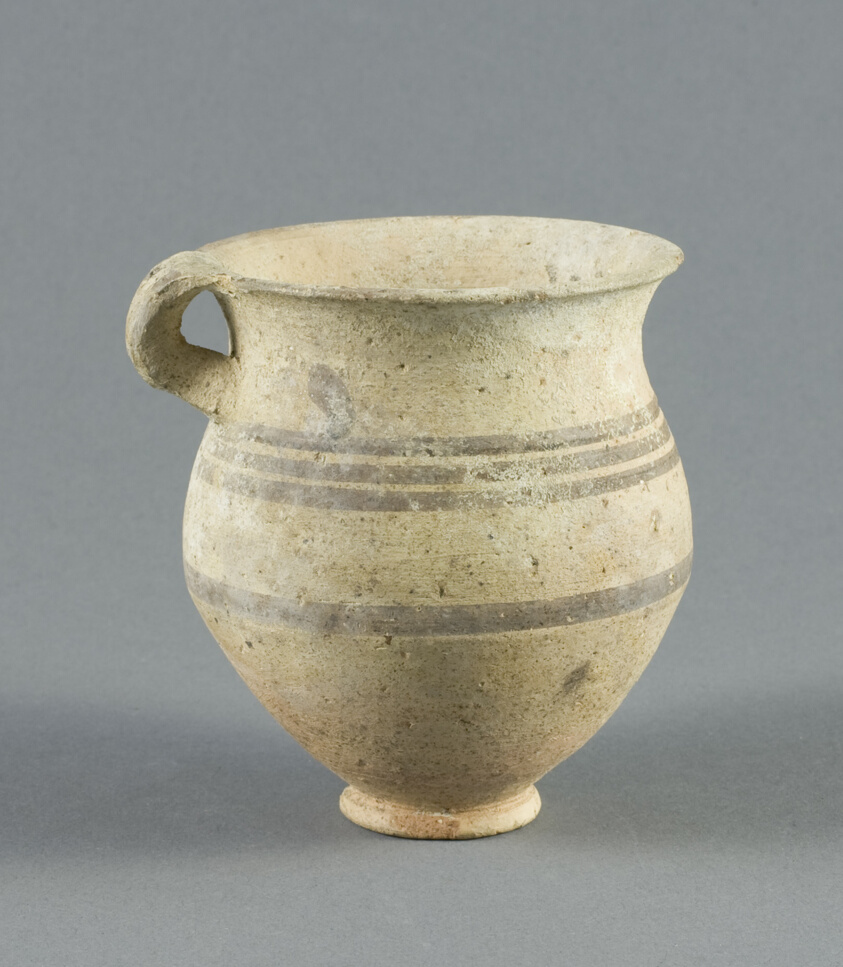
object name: Vessel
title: Cup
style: nabatean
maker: Nabatean; Arabia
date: about 1200 BCE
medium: terracotta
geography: Arabian Peninsula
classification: ceramics; asian art; vessel